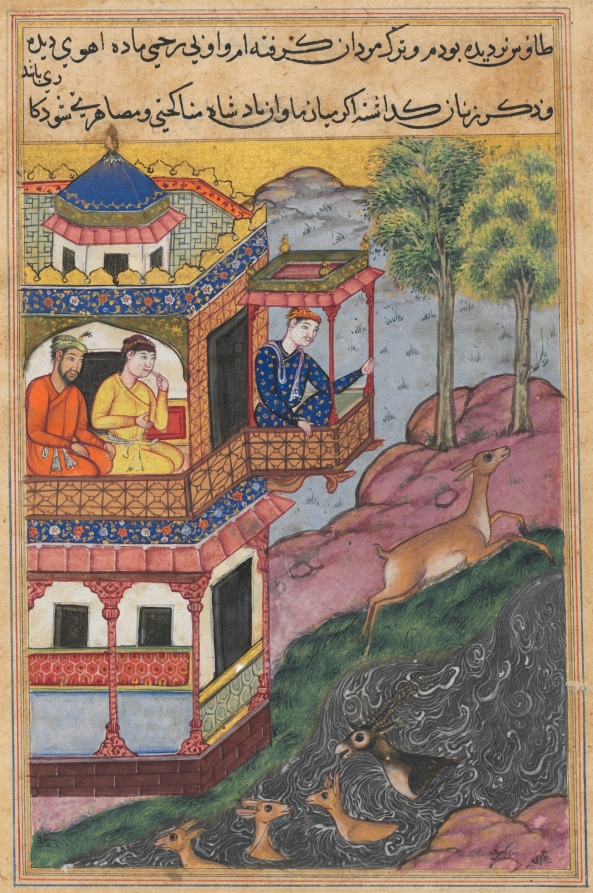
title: The painting made by the vizier of the emperor of China for the queen of Rum, from a Tuti-nama (Tales of a Parrot): Thirty-ninth Night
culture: Mughal India, court of Akbar (reigned 1556–1605)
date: c. 1560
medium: gum tempera, ink, and gold on paper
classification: Painting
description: Rather than depicting a scene from the story, this page reproduces the painting done by the vizier. The image shows the emperor of China watching from his palace as a stag and his young are swept away in a flood. Beside the rushing water, a doe runs from danger. After seeing this image, the queen agrees to marry the emperor.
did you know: The stag is depicted as a black antelope, which was a symbol for sacrifice in ancient India.